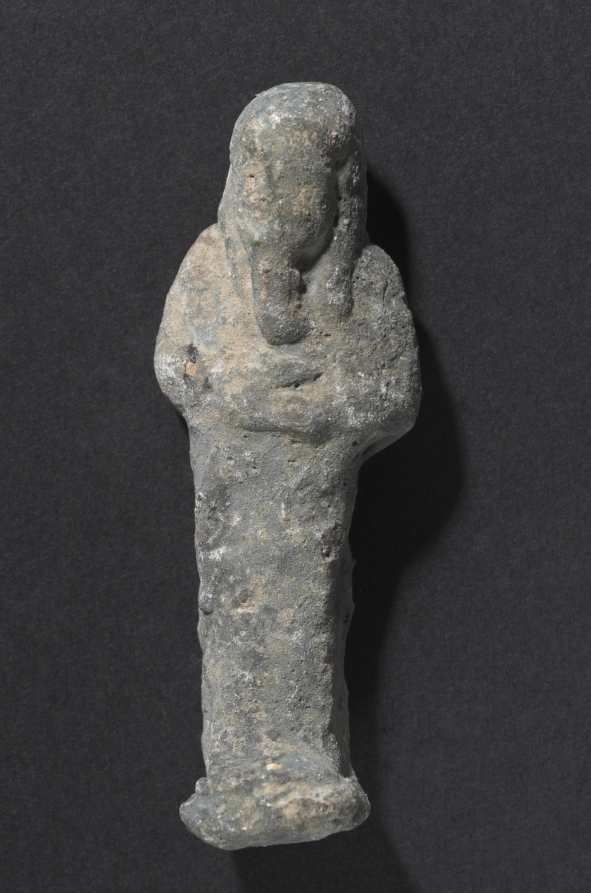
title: Shawabty of Ditamenpaankh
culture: Egypt, Late period (715–332 BCE), Dynasty 25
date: 715–656 BCE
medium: terracotta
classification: Funerary Equipment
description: High demand for shawabtys in the Late Period, a time when as many as 400 or more shawabtys were placed in the tomb with the deceased, gave rise to a specialized container for storing them: the shawabty box. This example is inscribed for the lady of the house, Ditamenpaankh, and was probably one of a pair originally made for her. The single-masted boat on the box's lid is perhaps an allusion to the pilgrimage of the deceased to the holy city of Abydos, the cult city of Osiris, king of the dead. The shawabtys inside are crude, mass-produced examples cast in an open mold. Made of terracotta, their blue paint imitates more costly shawabtys made of faience. As for the shawabty spell, it has been removed from its traditional location on the shawabty's front and relocated onto the sides of box, where it needed only to be written once, thus expediting production.